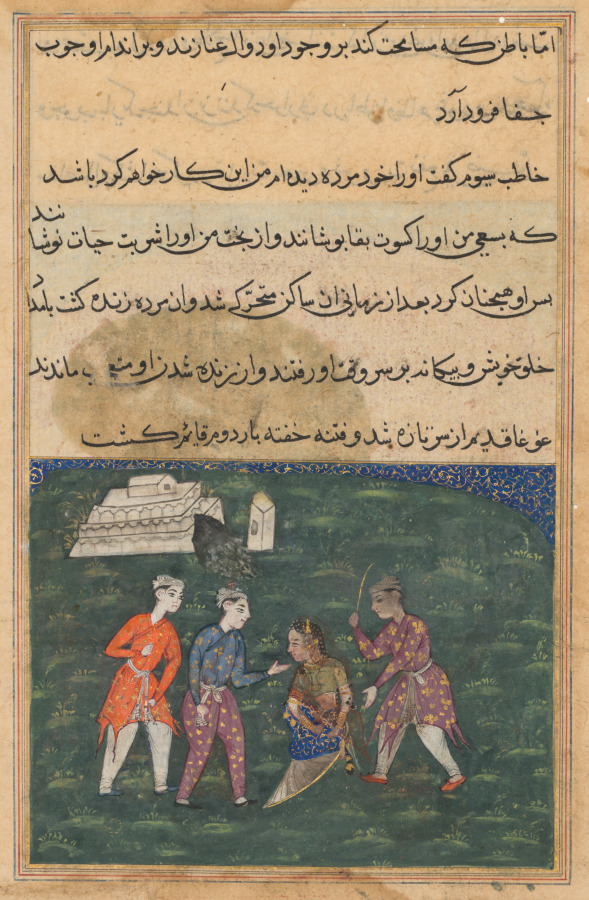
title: The third suitor strikes the devotee’s daughter and thus restores her to life, from a Tuti-nama (Tales of a Parrot): Twentieth Night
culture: Mughal India, court of Akbar (reigned 1556–1605)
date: c. 1560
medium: gum tempera, ink, and gold on paper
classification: Painting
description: After the sudden, apparent death of the pious man’s daughter, her three suitors take her body from its grave. One of the suitors, a doctor, realizes that the woman is not dead and proposes flailing her to restore her consciousness. After she is successfully revived, the men resume their rivalry.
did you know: The stain above the painting is from the acidic green pigment used to paint a tree on the reverse.